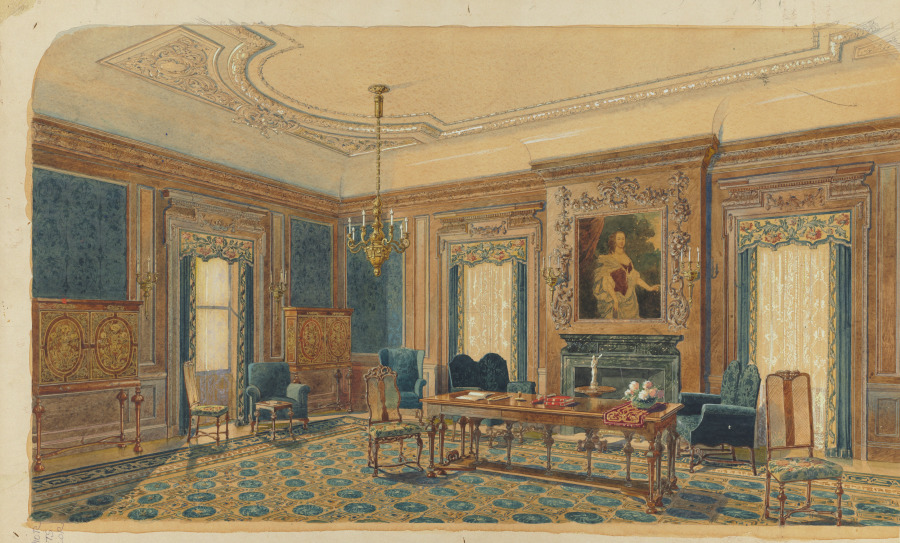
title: Sketch of Interior Design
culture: America, Ohio, Cleveland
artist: August Frederick Biehle, Sr. (American, 1854–1918)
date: before 1918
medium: watercolor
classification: Drawing